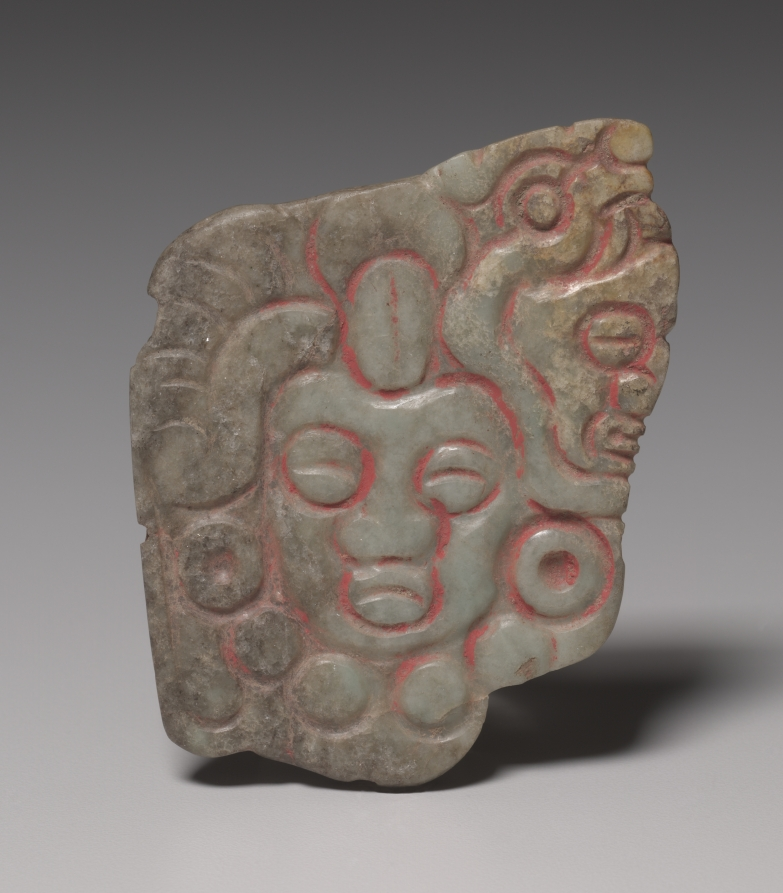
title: Offering Group: Plaque with Frontal and Profile Faces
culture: Mexico, Guerrero(?), San Jerónimo de Juárez, Xochicalco style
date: 800–1200(?)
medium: jadeite with albitite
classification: Sculpture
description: This greenstone plaque is said to have been found inside a translucent stone vessel, together with two shells (1990.252.1–3). A similar offering was found in a pyramid ornamented with feathered serpents at Xochicalco, a site south of the Valley of Mexico.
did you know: The red pigment may be cinnabar, the same mineral used to color Chinese lacquerware.